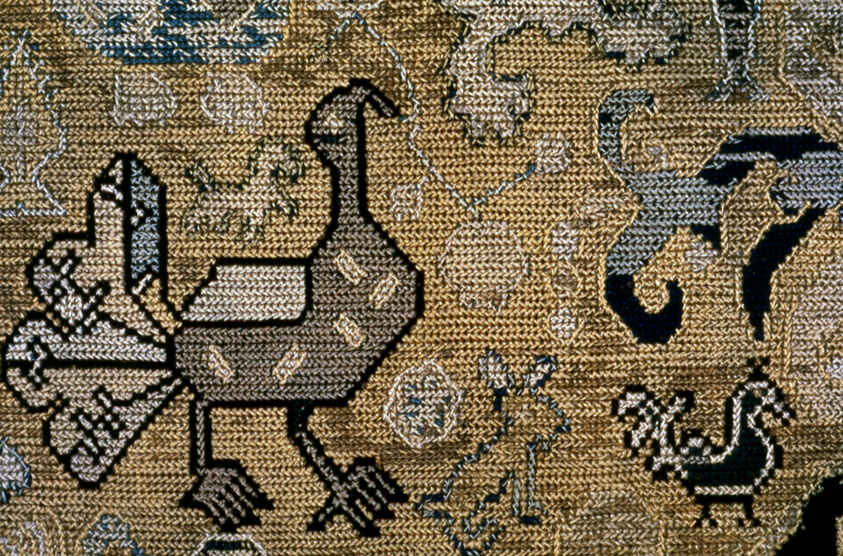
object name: Religious/Ritual Object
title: Altar Carpet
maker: Portugal, Arraiolas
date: 17th century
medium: Linen, plain weave; embroidered with wool in long-armed cross stitches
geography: Spain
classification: textile; needlework - carpet; ritual objects